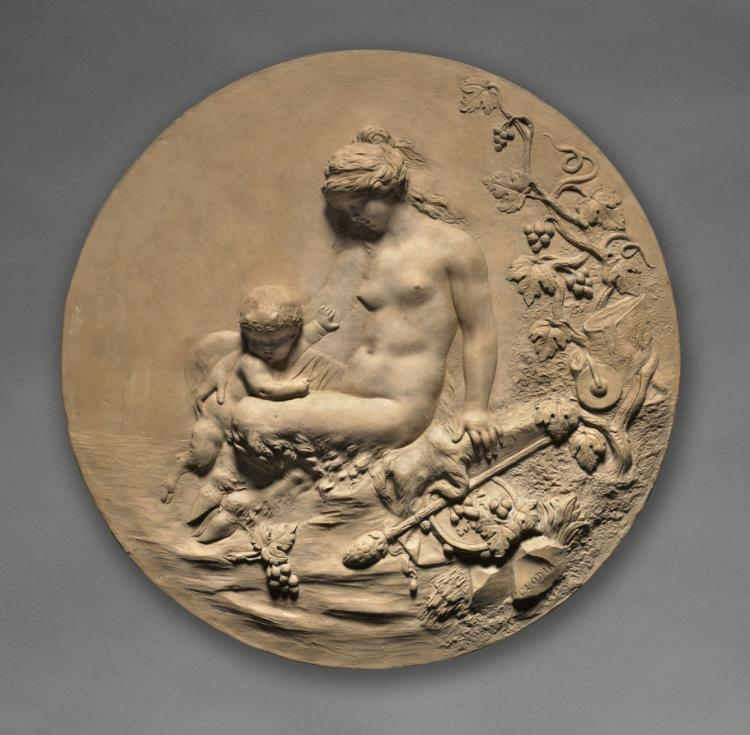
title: Satyress and Child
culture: France, early 19th Century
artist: Clodion (French, 1738–1814)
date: 1803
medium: terracotta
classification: Sculpture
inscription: inscribed recto lower right: CLODION; inscribed verso: A/L'ami Jean/Souvenir offert/ en mai/ 1803.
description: Born in Nancy to a family of artists, Clodion was one of the leading French sculptors of the ancien régime and Napoleonic era. He went to Paris to study sculpture in 1755 and worked in Rome from 1767 to 1771. Although inspired by the art of classical antiquity, as seen in the mythological subject of this terracotta relief, Clodion continued to model forms with a softness and delicacy reflective of his training during the Rococo period.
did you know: An invention of European artists of the post-Roman period, a satyress is the female equivalent of the male satyr in classical antiquity. Part human and part goat or horse, the satyress can be recognized by her animal legs and hoofs.